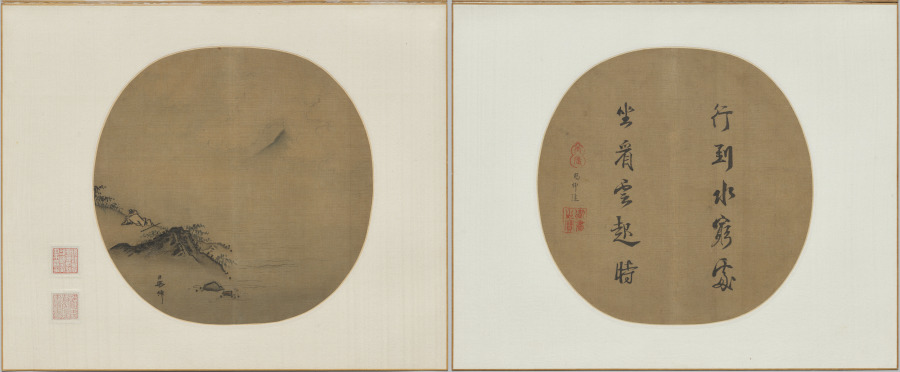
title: Scholar Reclining and Watching Rising Clouds; Poem by Wang Wei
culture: China, Southern Song dynasty (1127-1279)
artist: Ma Lin (Chinese, c. 1185–after 1260)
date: c. 1256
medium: Album leaf; ink on silk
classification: Painting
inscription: Inscription for 1961.421.1: Artist's signature: 臣馬麟 Your servant, Ma Lin. 2 seals on mounting of Chu Sheng-chai (20th c.).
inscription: Inscription for 1961.421.2: The 2 lines of poetry from right to left read: "I walk unto where waters end/ And sit down to watch when clouds arise."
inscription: Seals and Inscription for 1961.421.2: The top gourd-shaped seal has the cyclical date "bingchen" (丙辰 1256); the lower square seal is the Seal for Imperial Calligraphy. The inscription between the two imperial seals reads, "Presented to Chung-kuei".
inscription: Seals and Inscription on facing leaf for 1961.421.2: Inscription by Zhang Daqian (1899–1983). 1 seal of Chu Sheng-chai (20th Century) remounted onto the facing leaf to the left of the square calligraphy.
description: Poem and painting, once mounted together as one fan, exemplify the collaboration between imperial patron and court painter. Emperor Lizong’s calligraphy cites a verse from Wang Wei’s (701–761) poem, Walking to where the water ends, I sit and watch when clouds arise. Ma Lin’s response is this painting. At the water’s edge, a scholar reclines by a large rock. The view leads across the empty middle ground to a distant mountain. With sparse ink and subtly graded washes, Ma Lin visualizes the poetic verse. The painting suggests the impact of Chan aesthetics through interaction between the palace, literati-officials, and monasteries around Hangzhou.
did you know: Ma Lin was the son of Ma Yuan, the artist renowned for his unique composition and often referred to as "One-corner Ma."